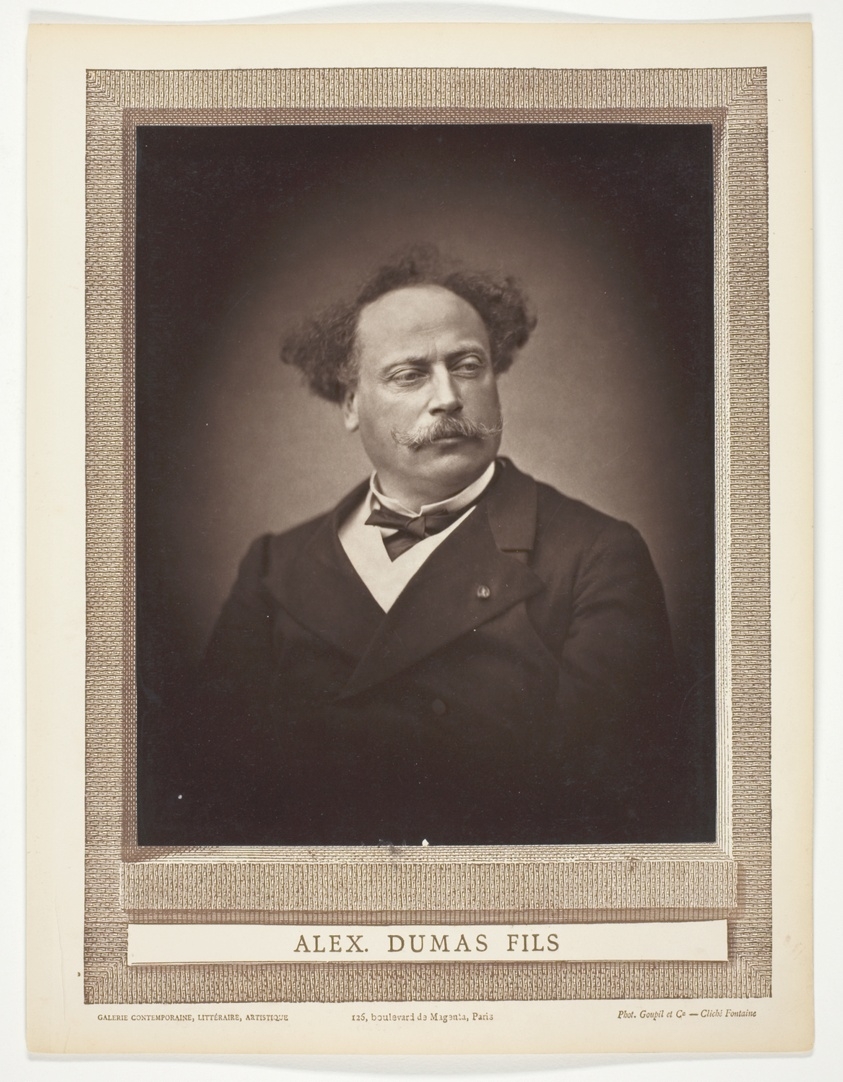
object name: Photograph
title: Alexandre Dumas, fils (French novelist and playwright, 1824-1895)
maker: Fontaine (French, 19th century)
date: 1975/76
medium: Woodburytype, from the periodical “Galerie Contemporaine Littéraire, Artistique” (1876), volume 1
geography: France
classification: woodburytype; photomechanical process; photography; photograph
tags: Collected by Hugh Edwards, Contemporaine Littéraire